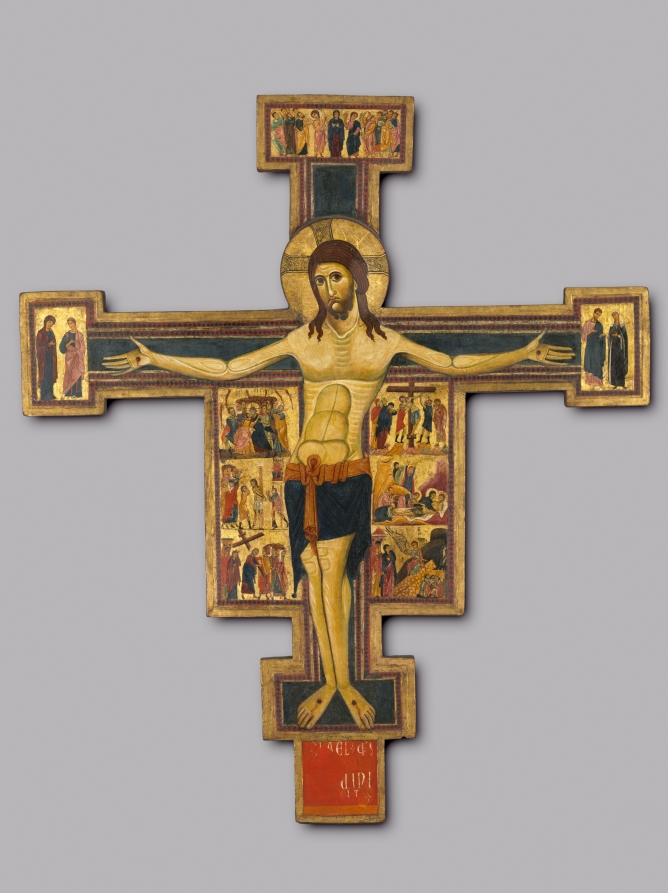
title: Crucifix with Scenes of the Passion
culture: Italy, Pisa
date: c. 1230–40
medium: tempera with gold on panel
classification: Painting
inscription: signed below: [GH]AEL q./...VINI/IT (i.e. Ghael quondam ... vini)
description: Large painted crucifixes dating from the 1100s and 1200s are among the earliest surviving Italian panel paintings. Large crosses, like this beautiful example, were typically suspended high above an altar in the main apse of Italian churches. Smaller crosses were placed on or just above altars in small side chapels. Such crosses served as the visual focus for devotion and symbolized the Eucharistic sacrament performed by the priest on the altar below. This crucifix shows Christ alive on the cross as the triumphant savior of mankind. Smaller images on the "apron" represent images of Christ's Passion (to the left) and his death and Resurrection (to the right). On the far left terminal appear the mourning Virgin and Saint John the Evangelist, while on the right the viewer is shown Saint James Major and Saint Bona, patroness of the city of Pisa. The concluding event, the Ascension of Christ, once appeared on the upper terminal, just above the Virgin and Apostles. The figure of Christ is painted in a severe and hieratic style suggestive of medieval Pisa's artistic and commercial links with the Byzantine East. The appearance of Saint Bona on this cross may suggest that it was made for the Church of S. Martino in Pisa, where Franciscan nuns tended the holy woman's relics.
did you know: Although the artist did sign this panel at the bottom, the signature is illegible, his first name perhaps being Michael.